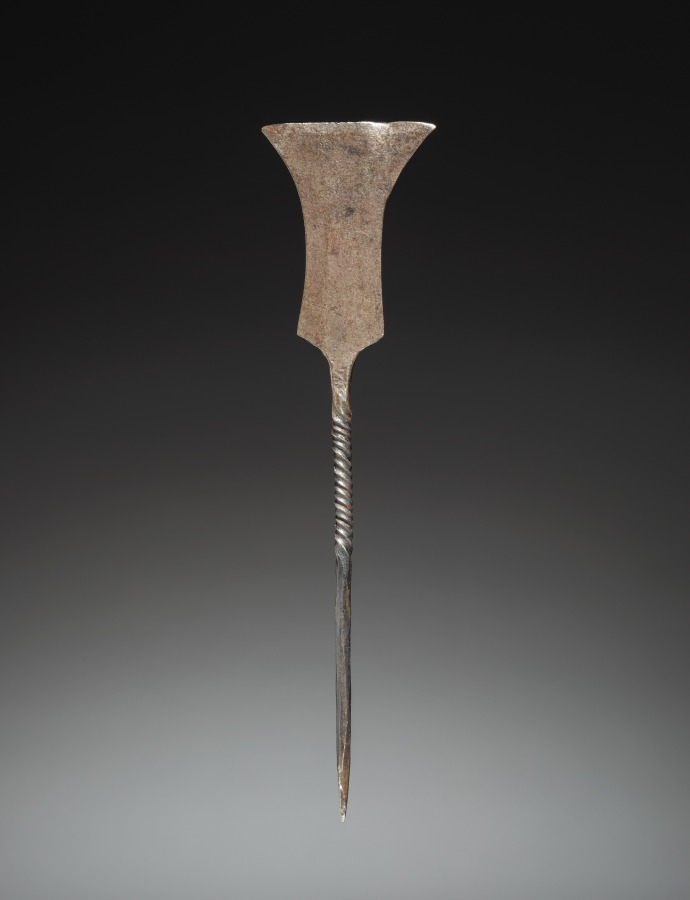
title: Hair Ornament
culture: Africa, Central Africa, Democratic Republic of Congo, Luba-style maker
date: Unassigned, before 1915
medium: Iron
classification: Jewelry